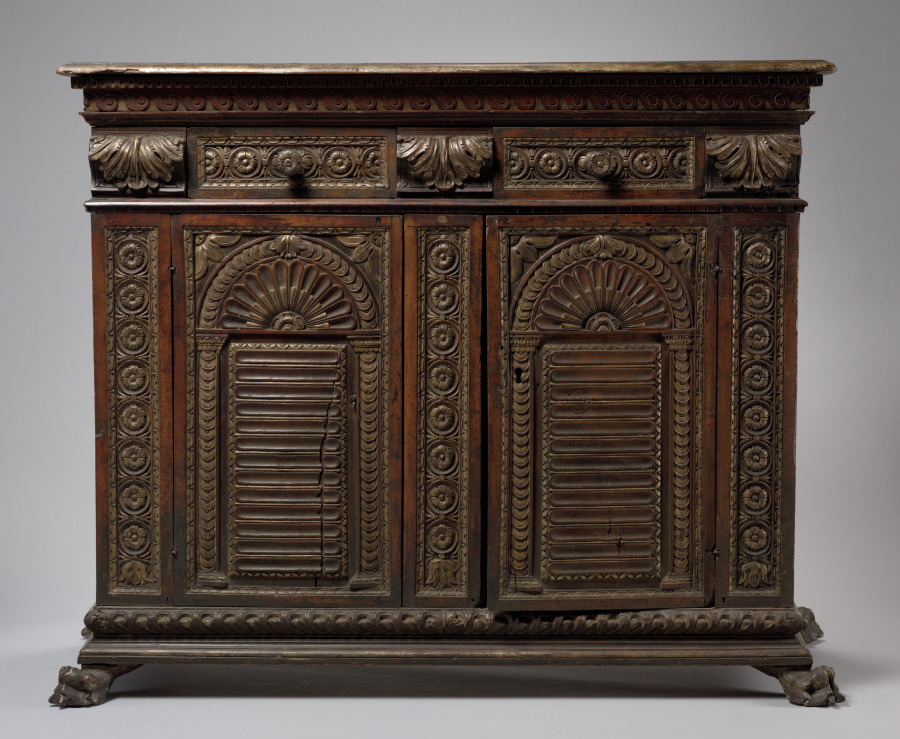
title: Credenza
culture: Italy, Brescia, 16th century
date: mid 1500s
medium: walnut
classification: Furniture and woodwork